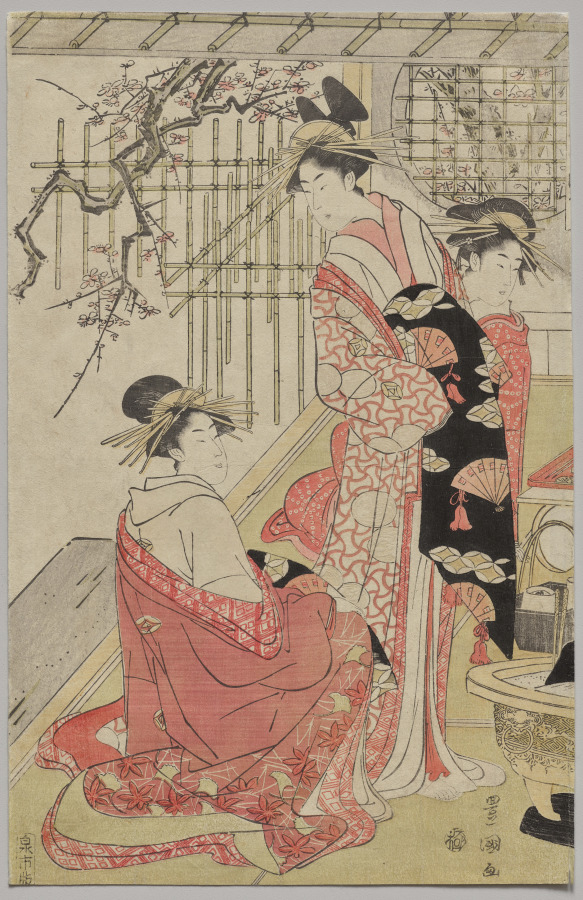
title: Courtesans of the Ōgiya on a Spring Outing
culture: Japan, Edo period (1615–1868)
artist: Utagawa Toyokuni (Japanese, 1769–1825)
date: mid- or late 1790s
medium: One of a triptych of woodblock prints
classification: Print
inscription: Signature: Toyokuni ga Publisher: Izumiya Ichibei (Senichi han) Censorship Seal: kiwame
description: In these prints, two courtesans of the Ōgiya brothel are entering an open pavilion, while another group gathers around a Japanese hibachi inside. Hanaōgi, the most celebrated courtesan of Ōgiya in the late 1700s, is depicted at a desk. Holding a brush in her hand, she turns her head to one side as if gathering her thoughts before writing in the book before her. Both her position and her loosened hair separate Hanaōgi from her courtesan companions who wear elaborate coiffures. This depiction of her captures both her knowledge of poetry and her skill as a calligrapher.